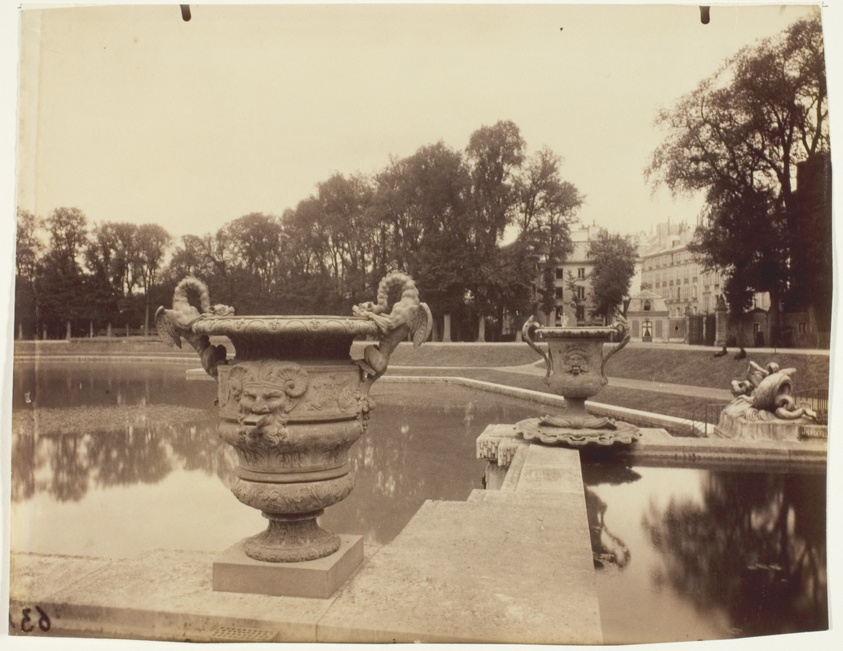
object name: Photograph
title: Versailles, Basin de Neptune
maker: Jean-Eugène-Auguste Atget (French, 1857–1927)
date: 1902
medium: Albumen print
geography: France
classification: albumen silver print; photographic process; photography; photograph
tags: Collected by Hugh Edwards